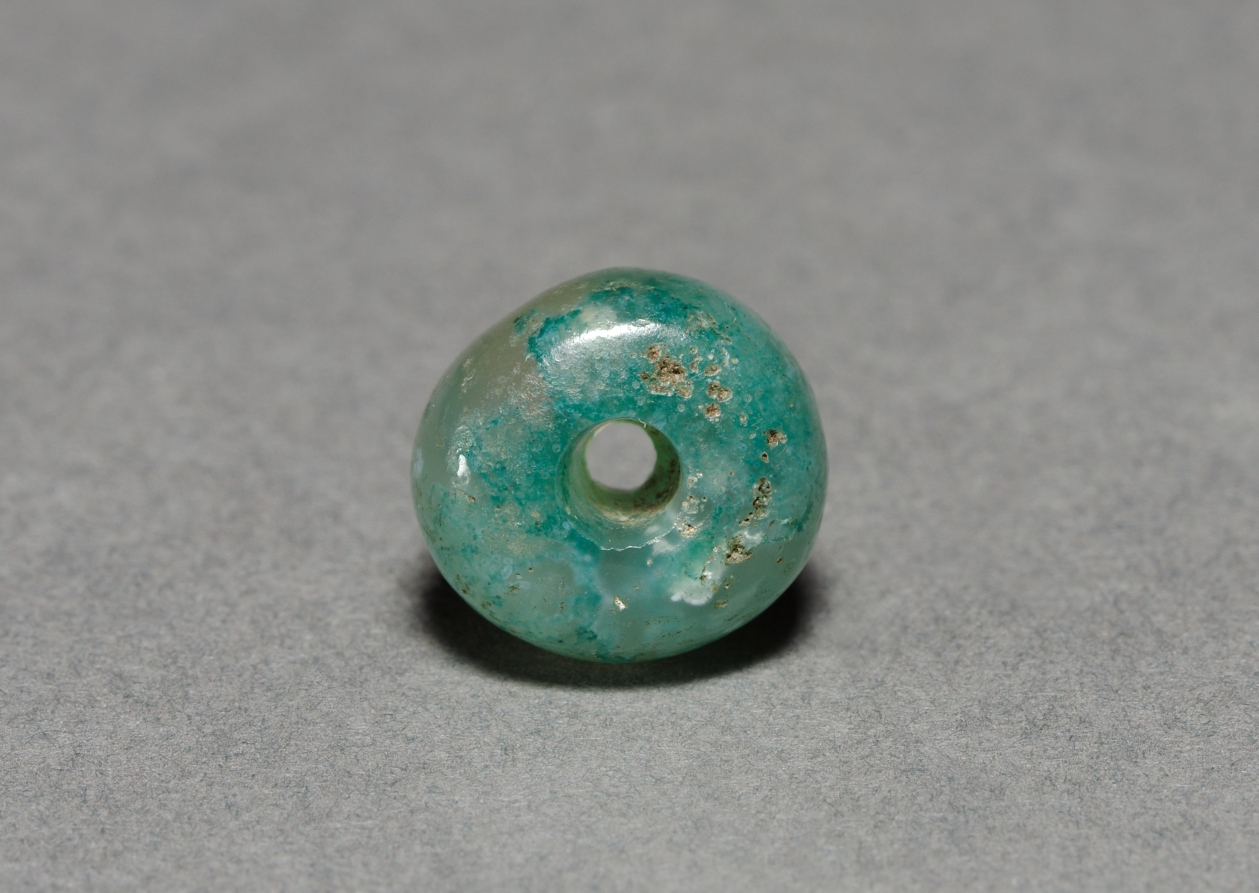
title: Bead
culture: Mexico, Pre-Columbian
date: before 1519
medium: jade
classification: Sculpture